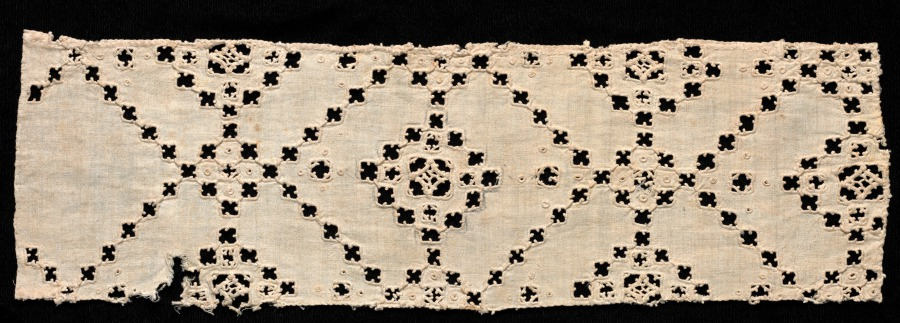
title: Lace Fragment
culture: Italy, 1660-1699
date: 1660–99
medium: Linen: needle lace (cutwork)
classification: Lace